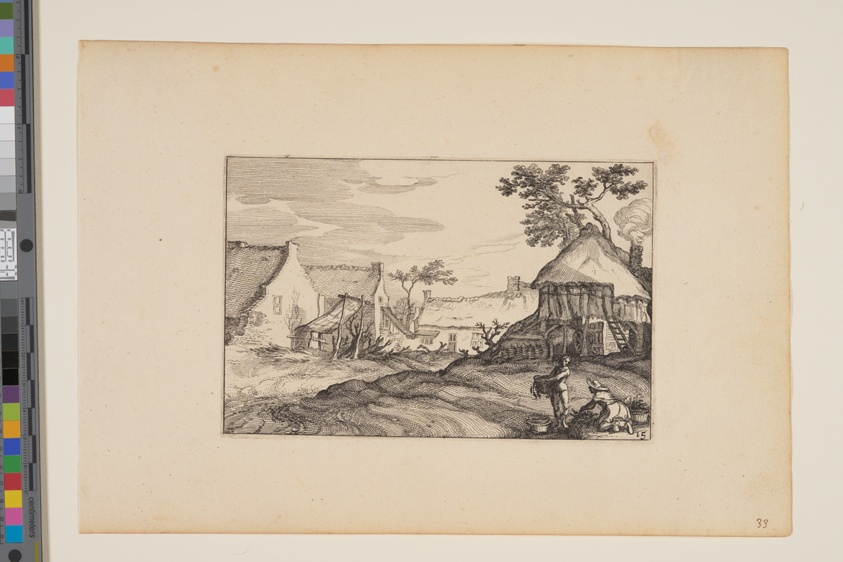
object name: Print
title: Farmyard Young Man and Woman in Foreground, from Landscapes (Verscheyden aerdige Lanthuysen...)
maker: Claes Jansz. Visscher (Netherlandish, c. 1550–c. 1612); after Abraham Bloemaert (Dutch, 1566–1651)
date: 1620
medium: Etching on ivory laid paper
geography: Netherlands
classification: print; paper; prints and drawing; etching